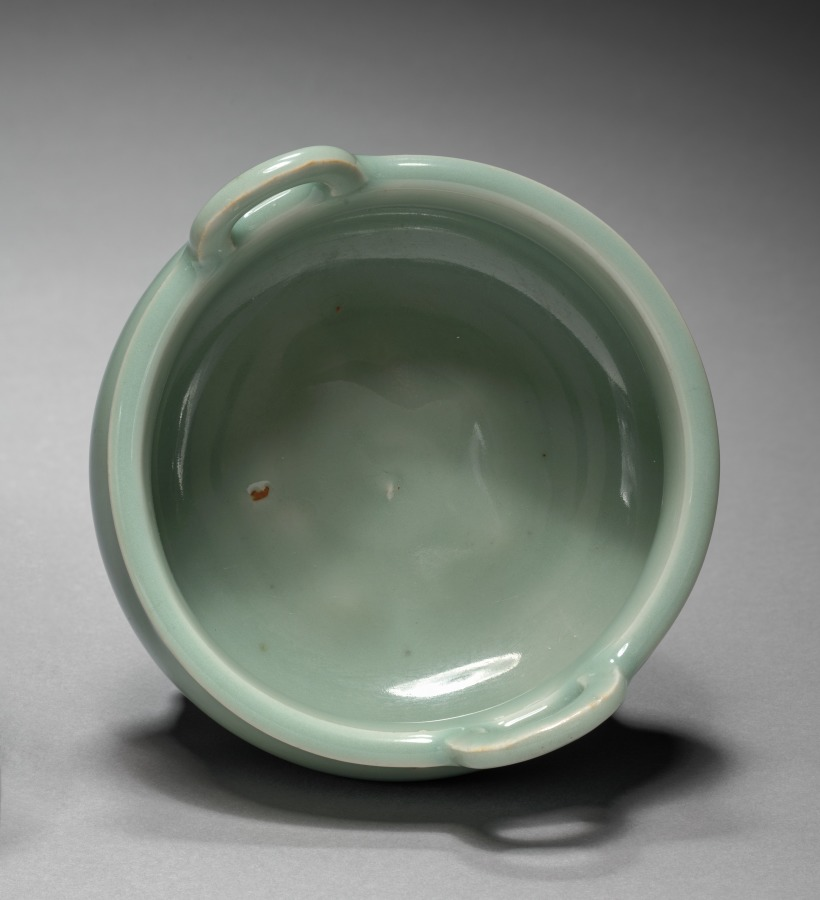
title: Cover for Incense Burner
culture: Japan, Meiji period (1868–1912)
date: late 1800s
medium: Gilt bronze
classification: Ceramic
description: This incense burner emulates Chinese porcelain in its glaze and form. A number of prominent ceramicists of the Meiji period explored classical Chinese forms and glazes, even as they also produced stoneware with Japanese-style glazes.